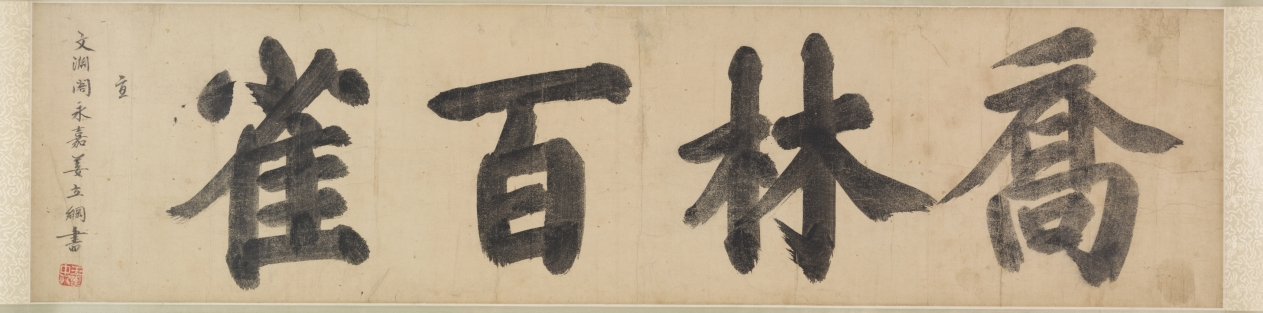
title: A Hundred Sparrows in a Lofty Grove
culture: China, Ming dynasty (1368–1644)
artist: attributed to Lin Liang (Chinese, 1416–1480)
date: 1368–1644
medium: handscroll; ink on silk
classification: Painting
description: Sparrows engaged in all kinds of activities frolic amid leafy branches, blades of grass, rocks, and a waterfall. As our eyes move over the scroll, the artist engages us in enjoying the sparrows’ carefree movements in a natural setting. The charming birds were painted from close observation in swift and fluent brushstrokes. Sparrows are a common bird and in Chinese painting they often represent the commoner in human society as opposed to the noble pheasant or peacock representative of the ruling class.